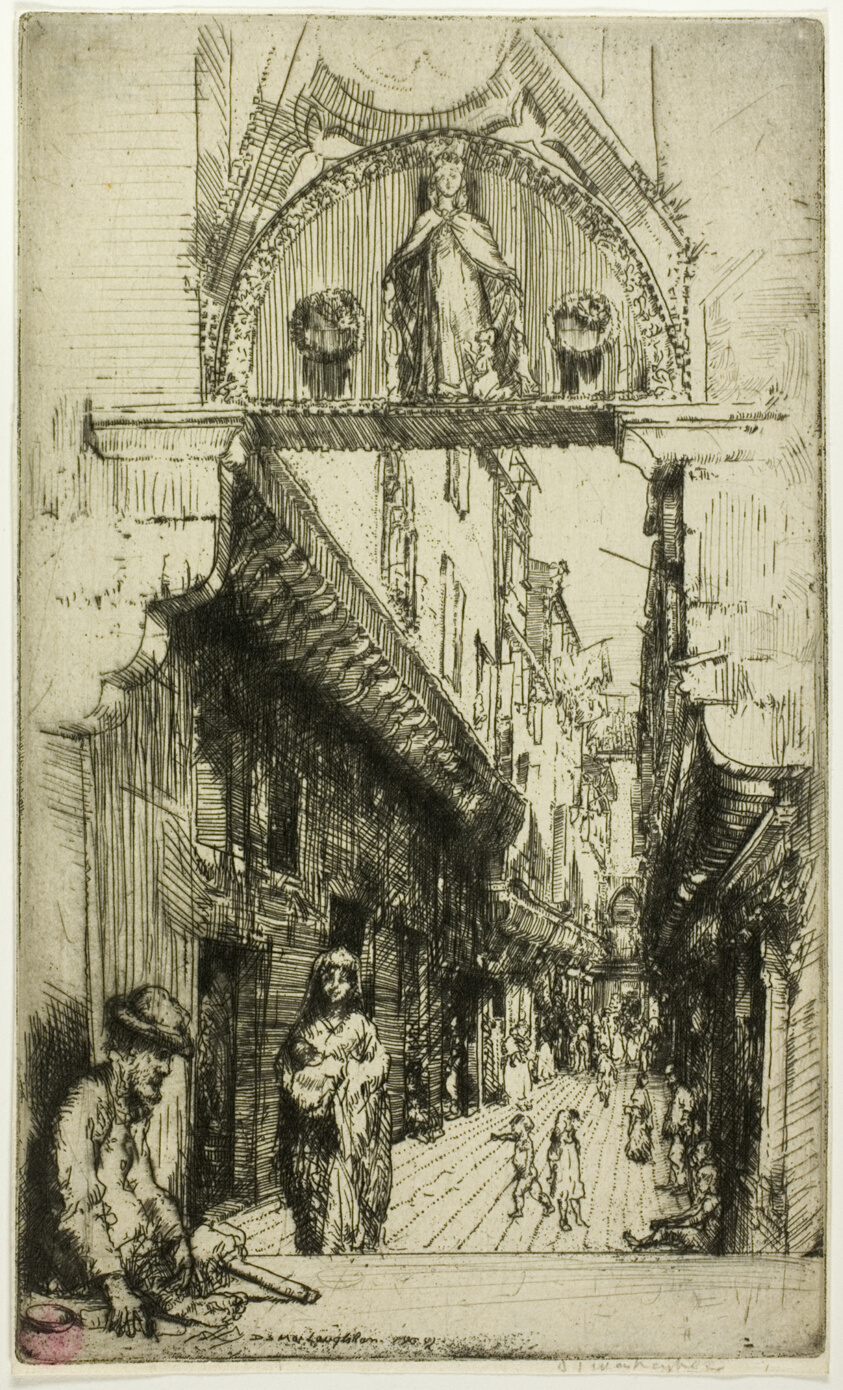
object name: Print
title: Calle del Paradiso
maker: Donald Shaw MacLaughlan (American, born Canada, 1876-1938)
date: 1909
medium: Etching in black on cream laid paper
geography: United States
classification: etching; print; prints and drawing